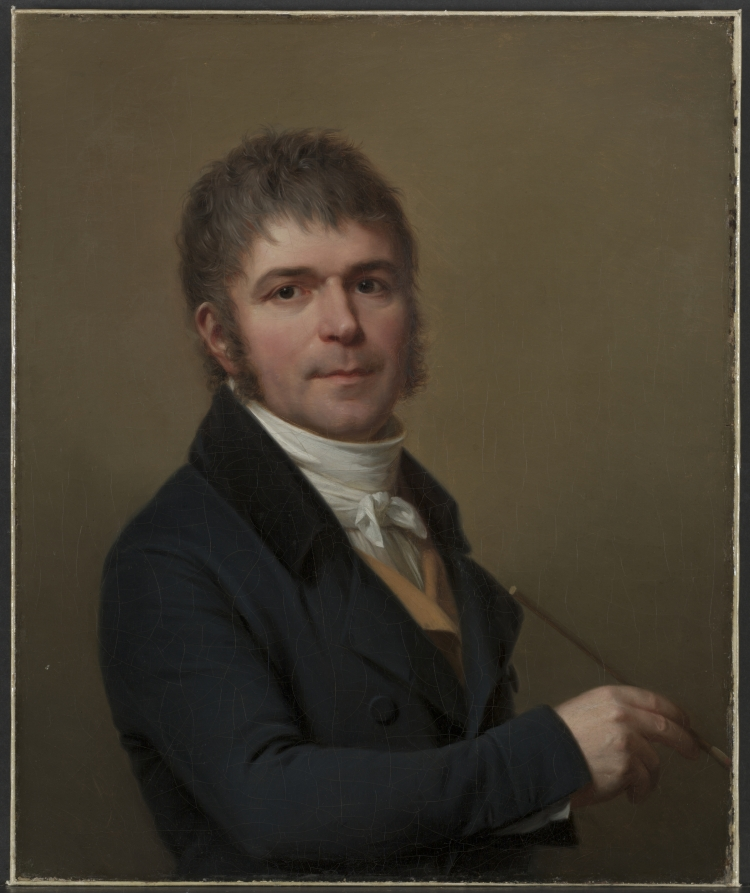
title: Self-Portrait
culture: France, 18th century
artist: Lié Louis Périn (French, 1753–1817)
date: c. 1790s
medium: oil on canvas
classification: Painting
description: Lié Louis Périn painted many self-portraits, but rarely ever at full scale. The son of a cloth manufacturer from Rheims, Périn left the countryside for Paris to pursue a career in miniature painting. Although he enjoyed a fast-growing reputation as a miniaturist among Parisian aristocracy, a full-scale self-portrait provided an opportunity to display his skills unhampered by the demands of a commissioned picture or painting in a miniature format.